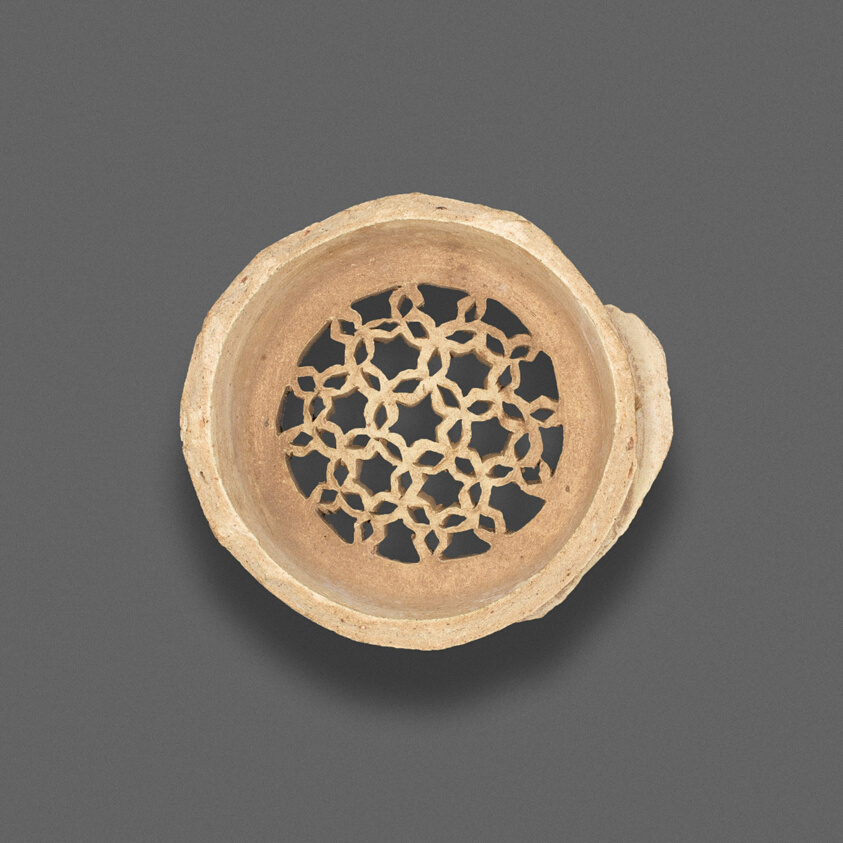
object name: Ceramics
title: Water Filter with Geometric Design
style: fostat, fatimid, Islamic (culture or style)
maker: Egypt; Fustat (Cairo)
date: Fatimid dynasty (969–1171), 11th/12th century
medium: Earthenware with pierced and incised decoration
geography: Old Cairo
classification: ceramics; asian art; architectural fragment